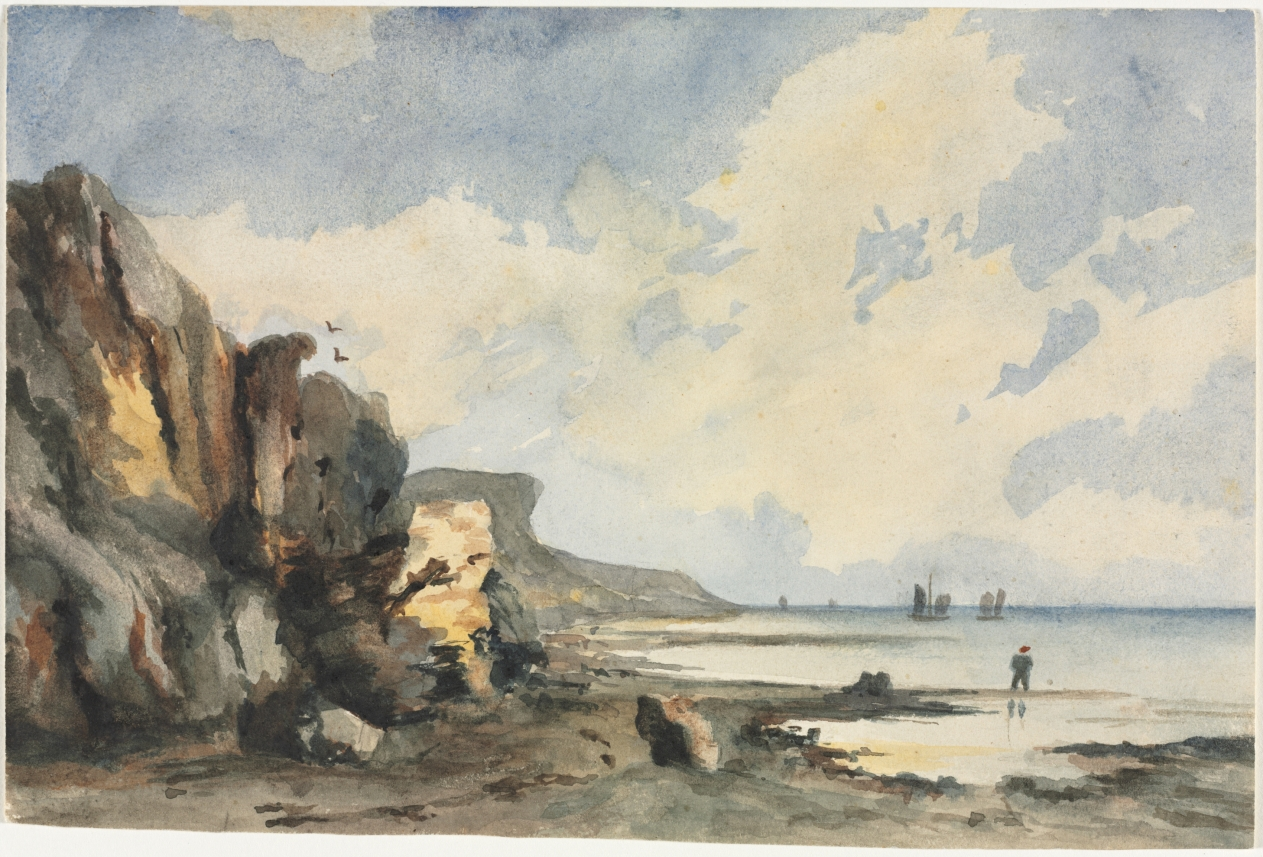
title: Coastal View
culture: England, 19th century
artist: Thomas Churchyard (British, 1798–1865)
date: c. 1818–65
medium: watercolor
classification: Drawing